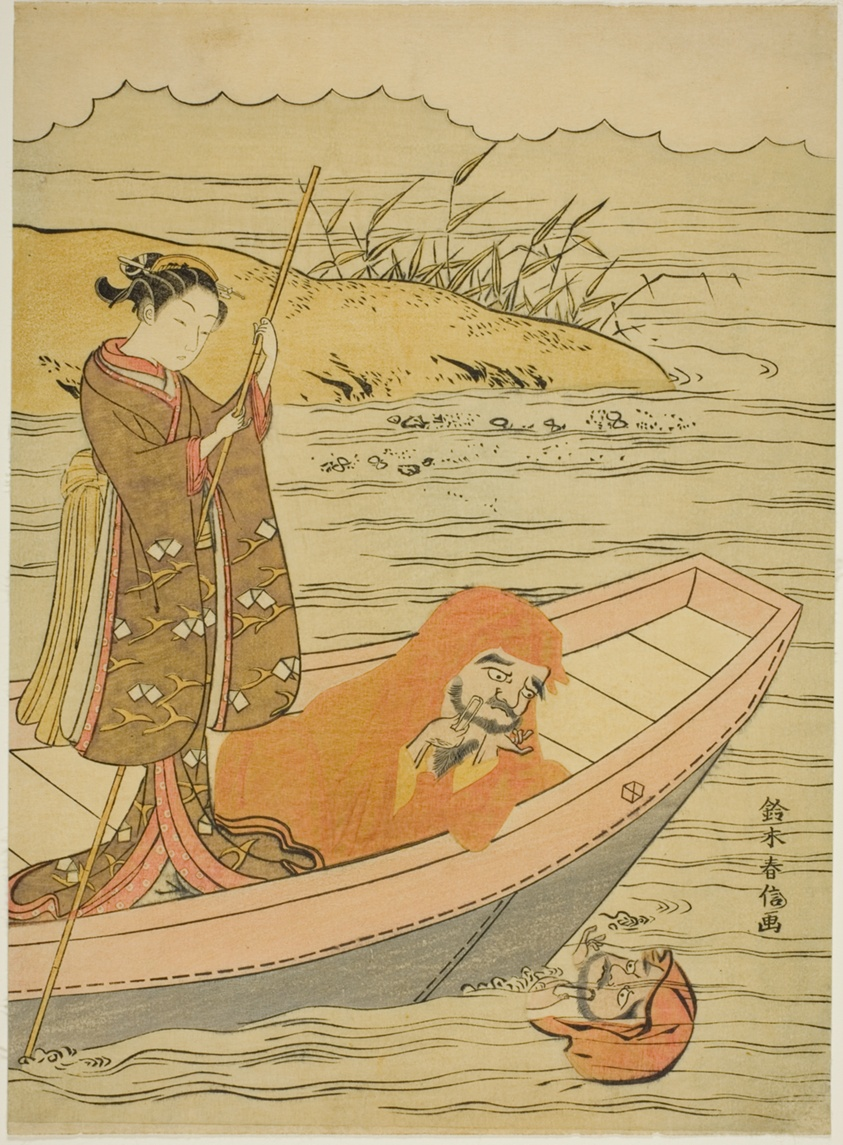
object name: Print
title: Daruma looking at his reflection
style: Japanese (culture or style)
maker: Suzuki Harunobu 鈴木 春信; Japanese, 1725 (?)-1770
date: c. 1767/68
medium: Color woodblock print; chuban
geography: Japan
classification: woodblock print; print; asian art